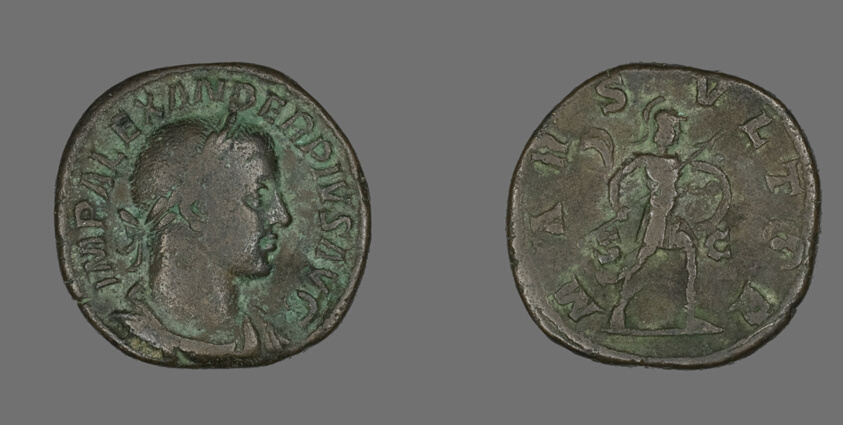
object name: Coin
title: Sestertius (Coin) Portraying Emperor Severus Alexander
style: roman (ancient, style or period)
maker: Roman, minted in Rome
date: 231-235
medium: Bronze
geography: Roman Empire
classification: coin; ancient art